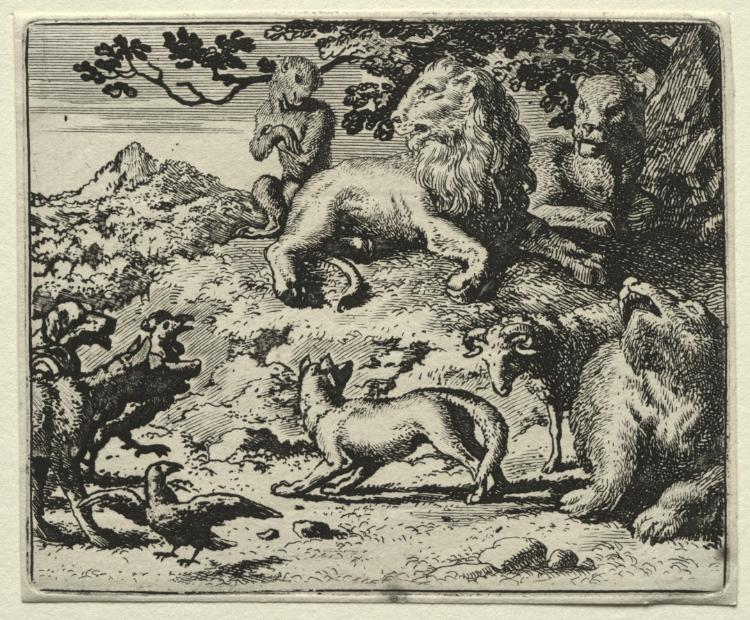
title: Reynard the Fox: The Animals Complain of Reynard's Pardon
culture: Netherlands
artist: Allart van Everdingen (Dutch, 1621–1675)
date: 1650–75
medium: etching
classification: Print